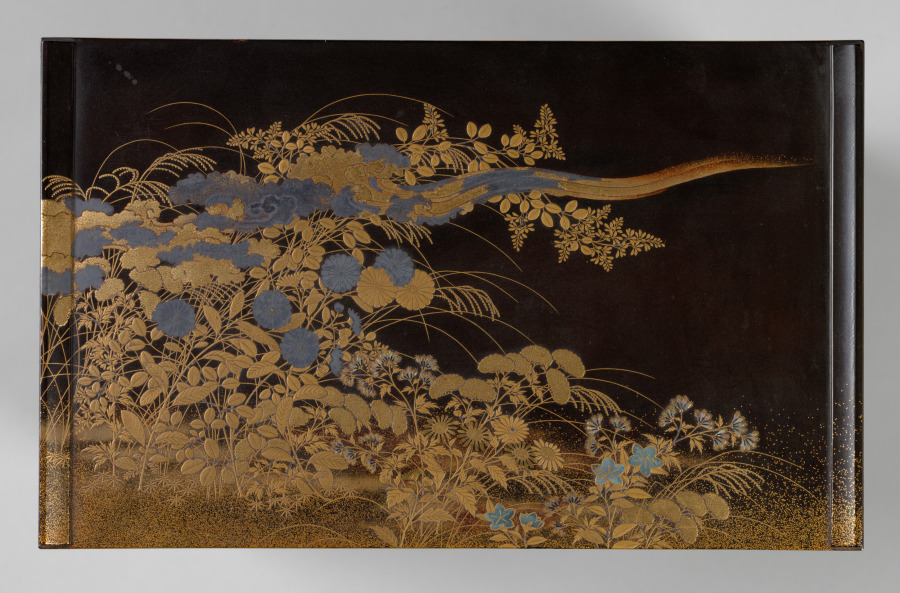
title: Ten-Round Incense Game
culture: Japan, Edo period (1615–1868)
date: 1700s–mid-1800s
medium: Lacquered wood with gold and silver sprinkled powder (maki-e) and mother-of-pearl inlay, metal fittings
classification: Lacquer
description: A popular pastime in the Edo period was a game in which a group of players passed around incense and guessed its name or scent. Small pieces of incense would be placed on thin mica plates and heated over hot ash, releasing their aroma for the players to smell. Players then cast their guesses with playing pieces. The game master kept score with the writing set. This game is handsomely decorated with images of deer in an autumn setting.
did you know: The blue and white porcelain containers in which the heated incense was passed feature designs of foreigners.